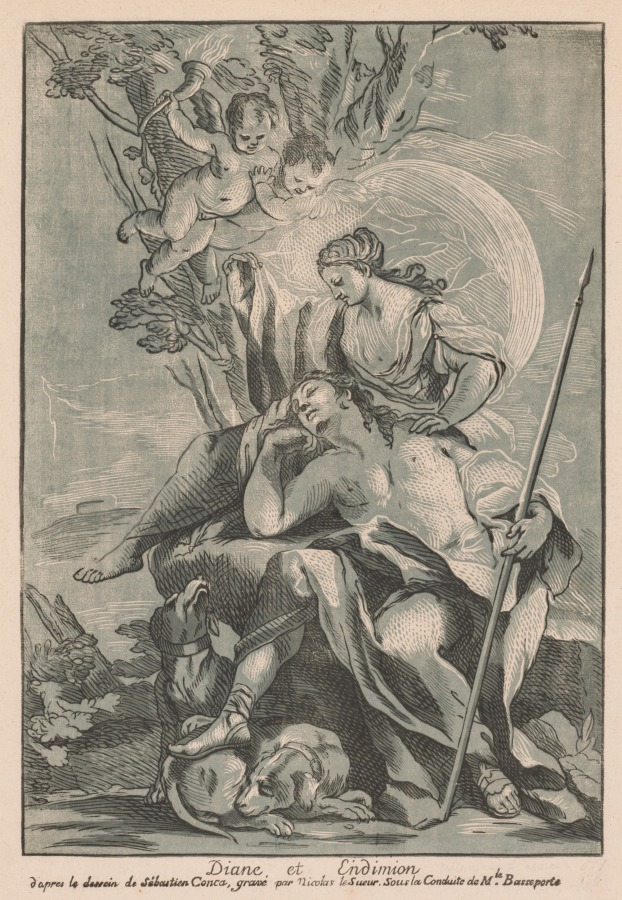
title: Diana and Endymion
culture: France, 18th century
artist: Nicolas LeSueur (French, 1691–1764)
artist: after Sebastian Conca (Italian, 1680–1764)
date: mid-1700s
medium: chiaroscuro woodcut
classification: Print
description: Chiaroscuro drawings were executed on paper colored a middle tone. While black or brown wash was used to create shadows, white gouache (opaque watercolor) was used for highlights. In the early 16th century, German printmakers developed a method to achieve similar effects using woodcut. The outline of the image is printed in black from one block of wood, while the shadows are printed from a second block in a color. For Diana and Endymion, two blocks were used to print two shades of green. The white, unprinted areas of the paper serve as the highlights. The technique of chiaroscuro woodcuts was revived in France in the early 18th century by LeSueur.